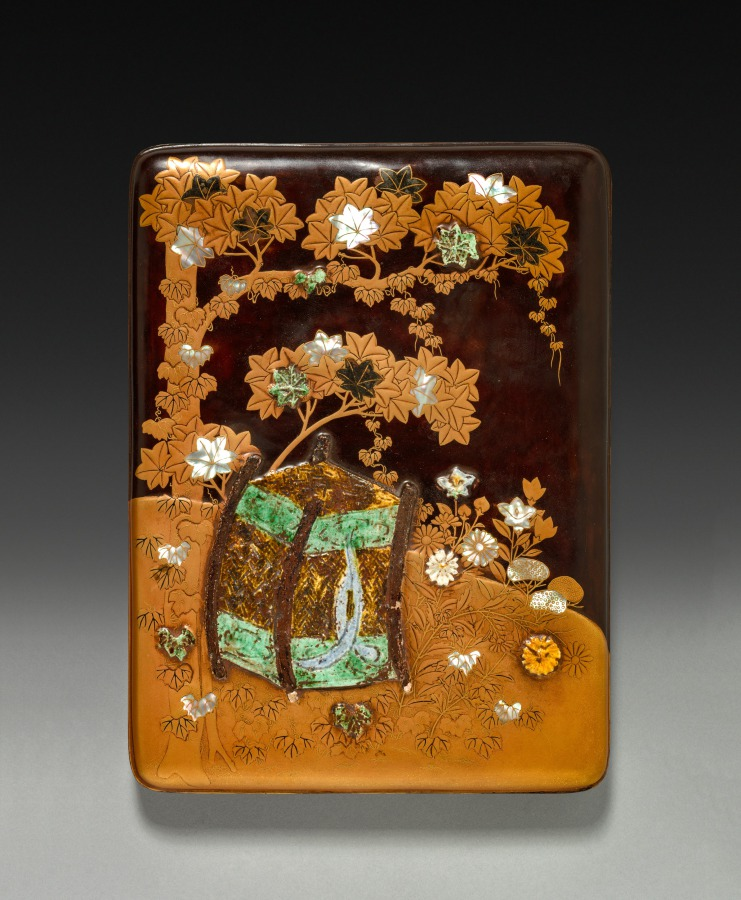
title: Inkstone Case (lid)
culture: Japan, Edo period (1615–1868)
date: 1800s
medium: lacquer on wood inlaid with mother-of-pearl, applied carved metal, and glazed ceramic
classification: Lacquer